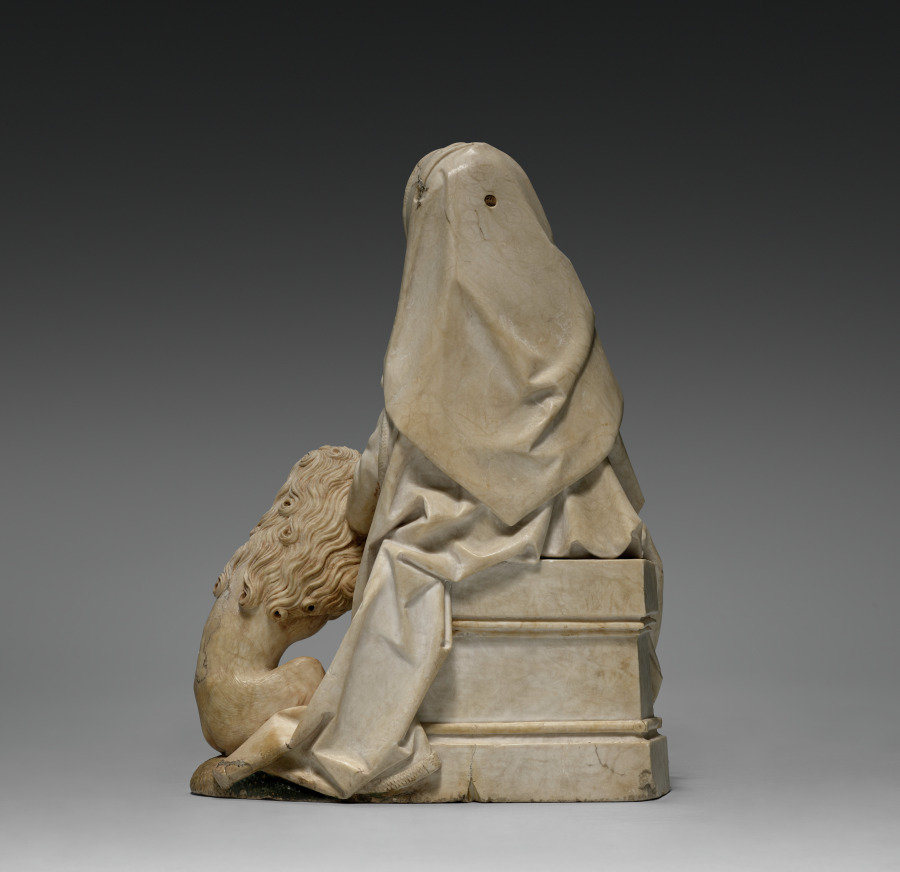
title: Saint Jerome and the Lion (From the former Church of St. Peter in Erfurt)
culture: Germany, Würzburg, late 15th Century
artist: Tilman Riemenschneider (German, active Würzburg, c. 1460–1531)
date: c. 1495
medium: alabaster, traces of polychromy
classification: Sculpture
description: According to legend, Saint Jerome (347–420 bce) lived in the desert, where he removed a thorn from an injured lion. Jerome is venerated in the Catholic Church as a Church Father, an important early author of Christianity. Here, he wears cardinal’s clothing from around 1500. Tilman Riemenschneider focused on Jerome’s relationship with the lion, creating empathy for the wounded animal. The delicacy of the depiction, which may have been partially painted to add highlights, is typical of alabaster, as is its fine polishing. The cord of the cardinal’s hat, missing today, may have been supplemented from another material.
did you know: In the story Saint Jerome encounters a fearsome lion, here depicted as diminutive, gentle, and submissive.